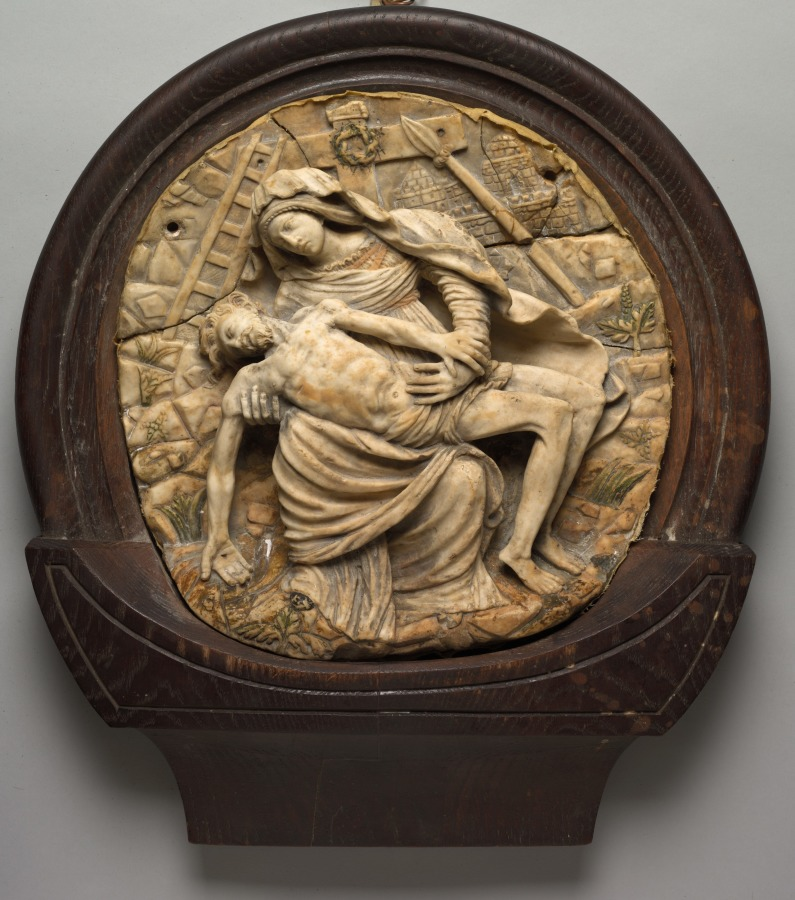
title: Pieta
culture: Spain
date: 1500–1530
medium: marble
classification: Sculpture